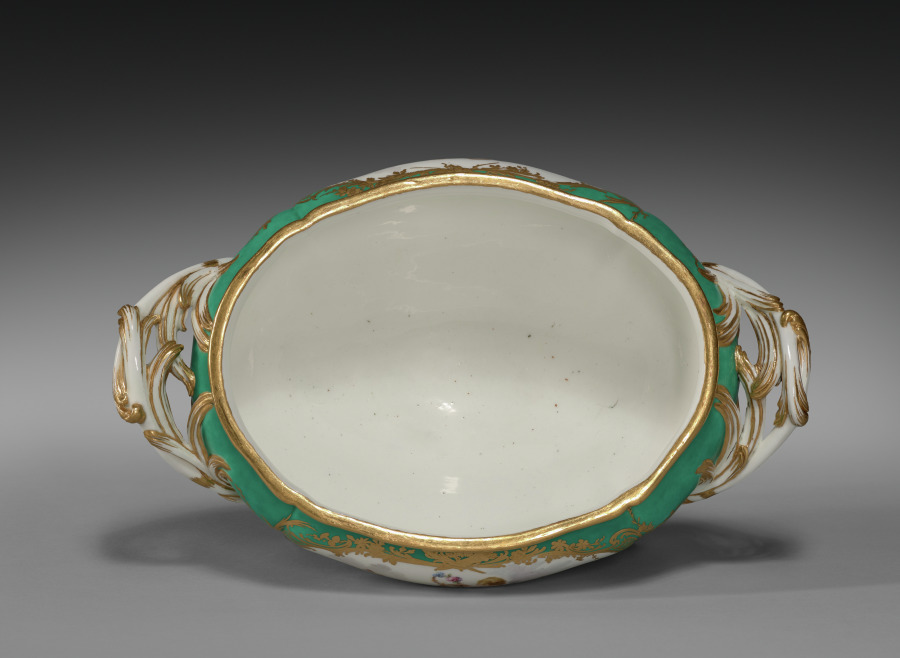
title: Tureen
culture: France, Sèvres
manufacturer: Sèvres Porcelain Factory (French, est. 1756)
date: 1756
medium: soft-paste porcelain with enamel and gilt decoration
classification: Ceramic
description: This tureen is probably from a service presented by Louis XV to King Frederick V of Denmark in 1758.